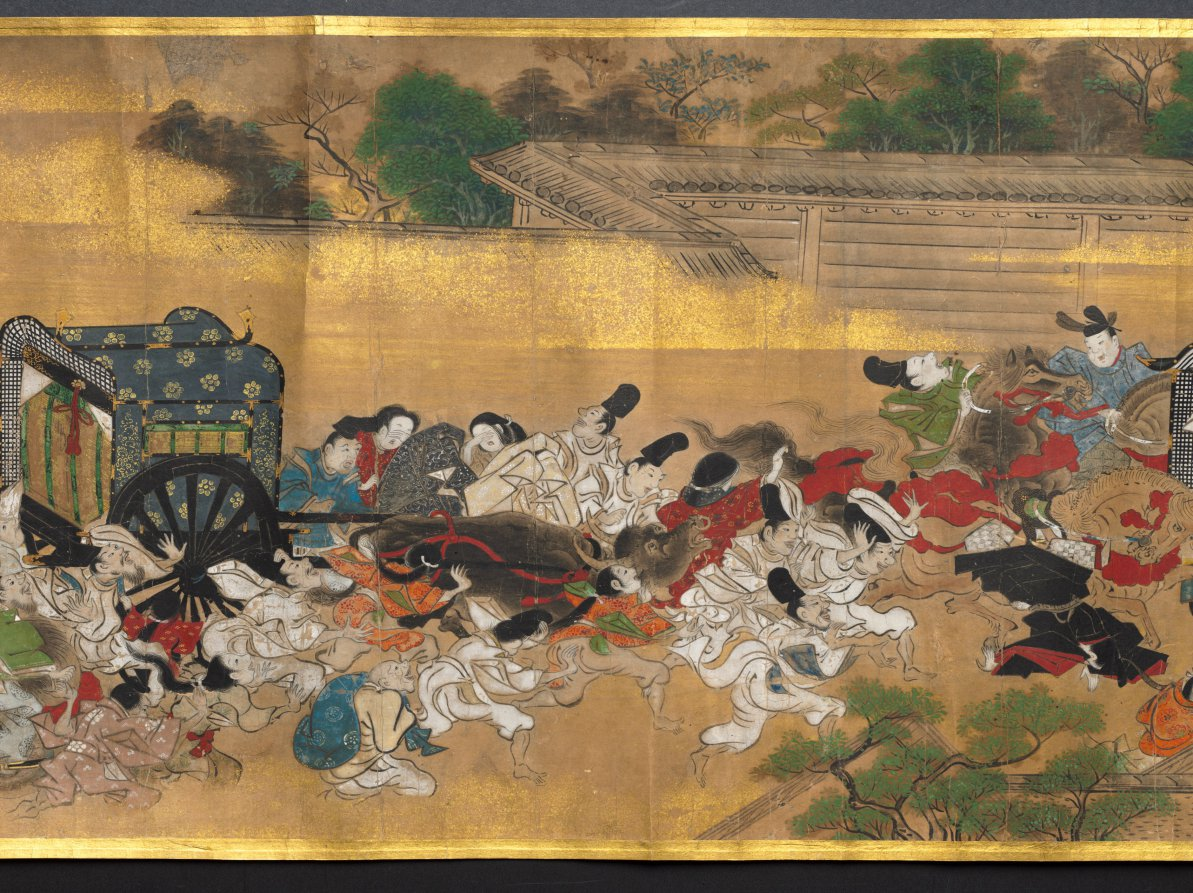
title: People Fleeing from a Fire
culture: Japan, Edo period (1615–1868)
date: 1615–1868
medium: Handscroll; color and gold on paper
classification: Painting